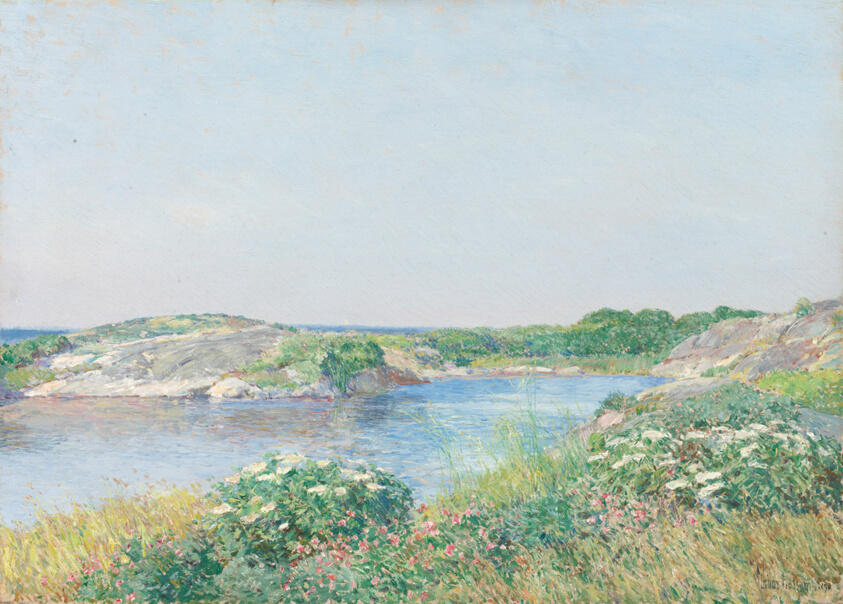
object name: Painting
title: The Little Pond, Appledore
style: Impressionism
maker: Childe Hassam (American, 1859–1935)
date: 1890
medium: Oil on canvas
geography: New Hampshire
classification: painting; american arts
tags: landscapes, weather/seasons, water